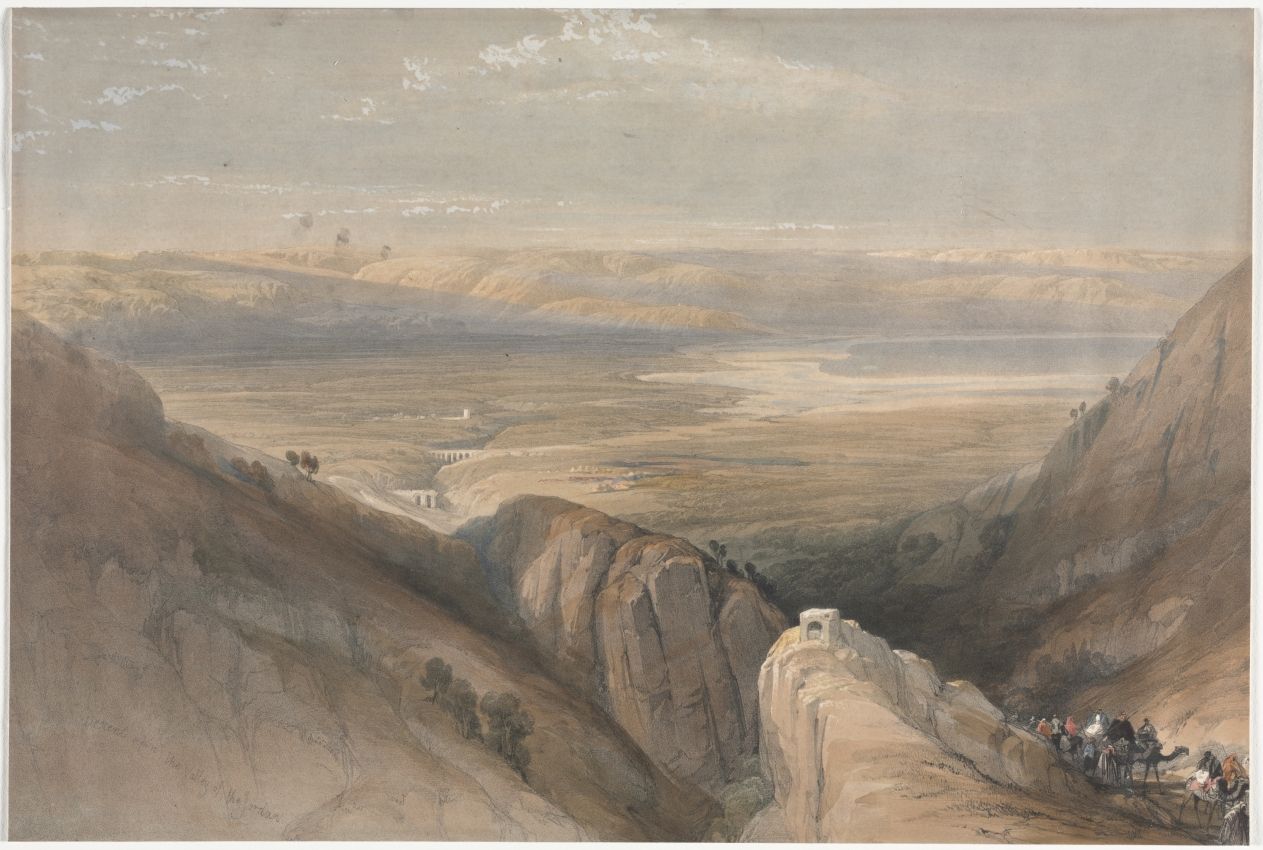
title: Descent from the Valley of the Jordan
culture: England, 19th century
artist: David Roberts (Scottish, 1796–1864)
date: 1839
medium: color lithograph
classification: Print